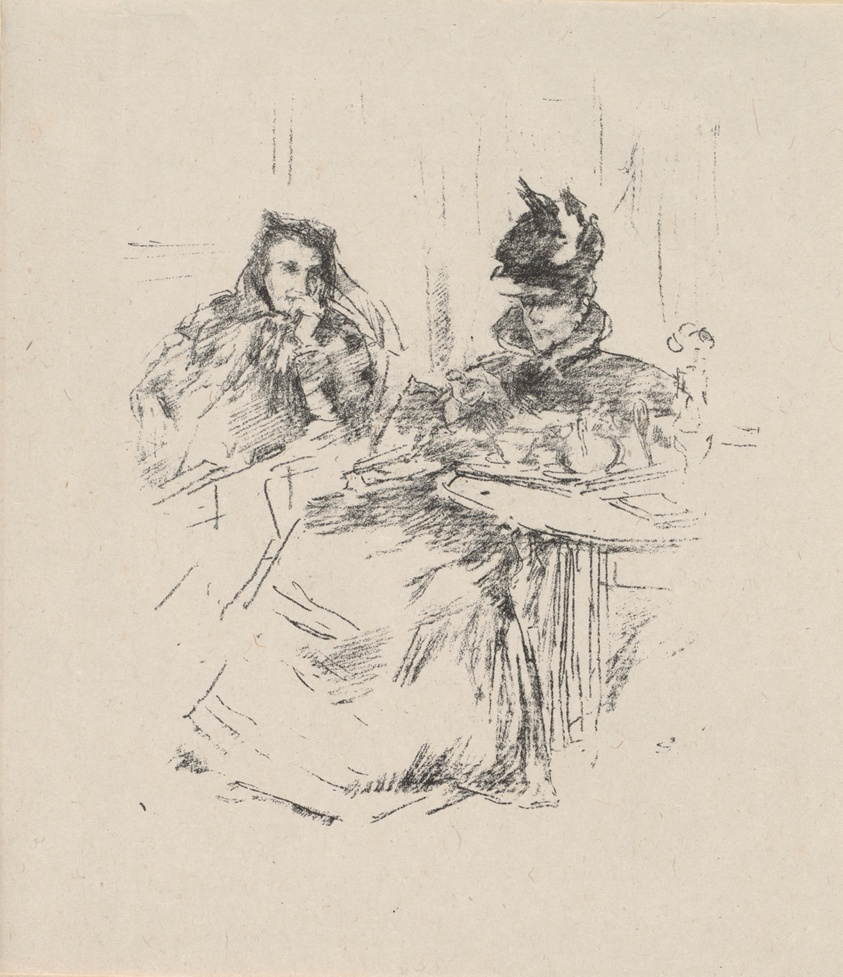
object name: Print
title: Afternoon Tea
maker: James McNeill Whistler (American, 1834-1903)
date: 1897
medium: Transfer lithograph in black ink on ivory Chinese paper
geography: United States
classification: transfer lithograph; lithograph; print; prints and drawing; paper